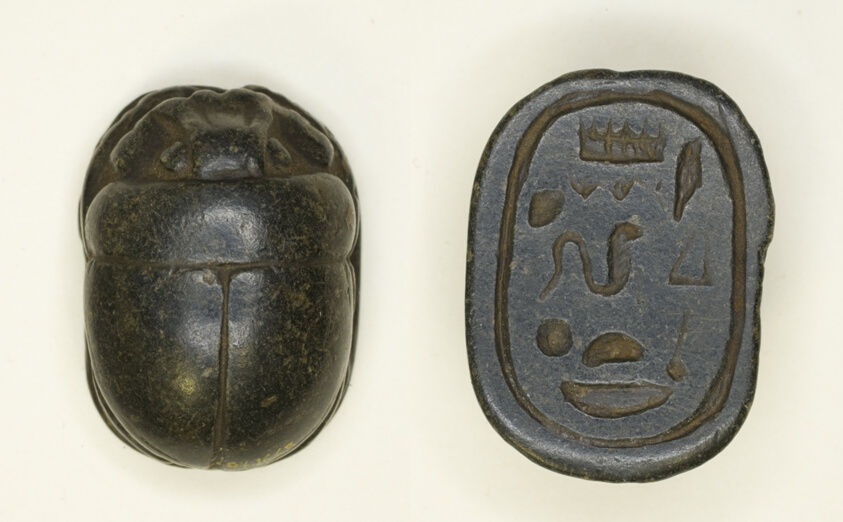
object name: Costume and Accessories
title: Scarab: Hieroglyphs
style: egyptian, ancient, late period (egyptian), third intermediate period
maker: Egyptian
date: Third Intermediate Period–Late Period, Dynasties 21–30 (about 1069–343 BCE)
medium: Stone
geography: Egypt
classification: scarab; stone; ancient art; costume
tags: Hieroglyphs, insects